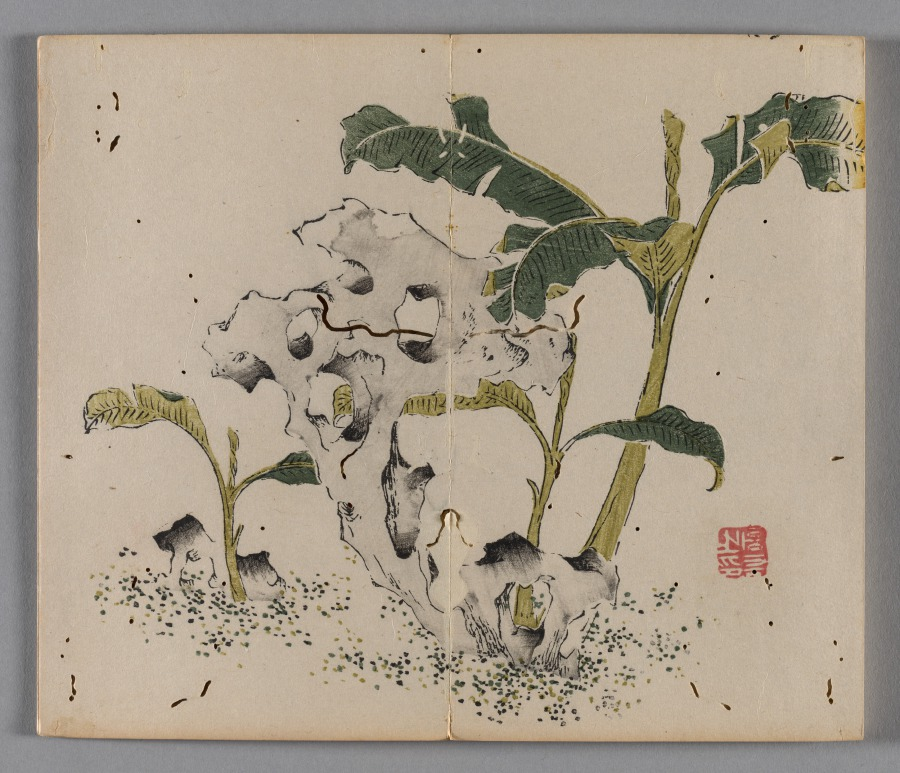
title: Ten Bamboo Studio Painting and Calligraphy Handbook (Shizhuzhai shuhua pu): Miscellaneous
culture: China, Qing dynasty (1644-1911)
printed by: Hu Zhengyan (Chinese, c. 1584–1674)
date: 1633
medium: Woodblock-printed book; ink and colors on paper; first edition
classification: Print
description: Color printing reached a level of perfection in the early 1600s, as seen in this Ten Bamboo Studio Collection of Calligraphy and Painting and the Mustard Seed Garden Manual of Painting (printed 1679 and 1701). The painterly quality, precision in registering (aligning) the woodblocks, and harmonious colors made them the most successful color print editions in Chinese history. Both editions were printed and compiled in Nanjing, spread nationwide, and had a great impact on the arts in Japan and Korea.